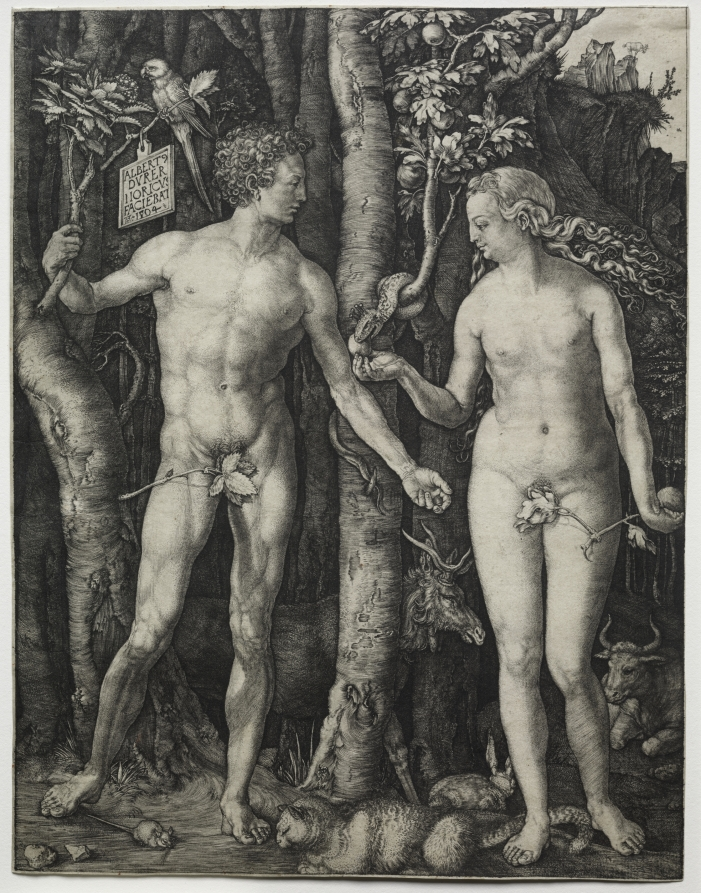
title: Adam and Eve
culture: Germany, early 16th Century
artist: Albrecht Dürer (German, 1471–1528)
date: 1504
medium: engraving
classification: Print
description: Dürer based Adam’s pose on the Apollo Belvedere, a Roman sculpture discovered in Italy during the late 1400s. He constructed the idealized bodies of Adam and Eve using geometry and a mathematical system of proportion loosely derived from ancient models. For Dürer, who mostly depicted Christian subjects, the creation of theoretically perfect human bodies was a pathway to comprehending the divine. He thus represented Adam and Eve as he understood them in both theological and artistic terms: moments before tasting the forbidden fruit, they are still uncorrupted by sin and death, existing in a state of faultless beauty.